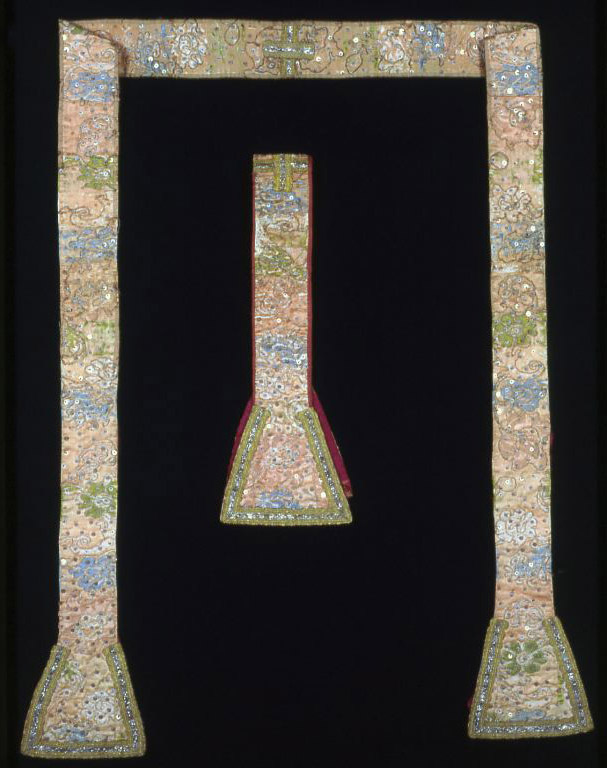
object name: Textile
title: Stole, Maniple, Pair of Amice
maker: Italy or Spain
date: Late 17th/early 18th century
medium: Silk, warp float-faced 7:1 satin weave self-patterned by ground weft floats; embroidered with gilt- and silvered-metal coils and gilt- and silvered-metal-strip-wrapped hemp in couching and padded couching; metal spangles; edged with tape of strips of plain and diamond twill weave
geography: Spain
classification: textile; needlework (visual works); liturgical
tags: vestments